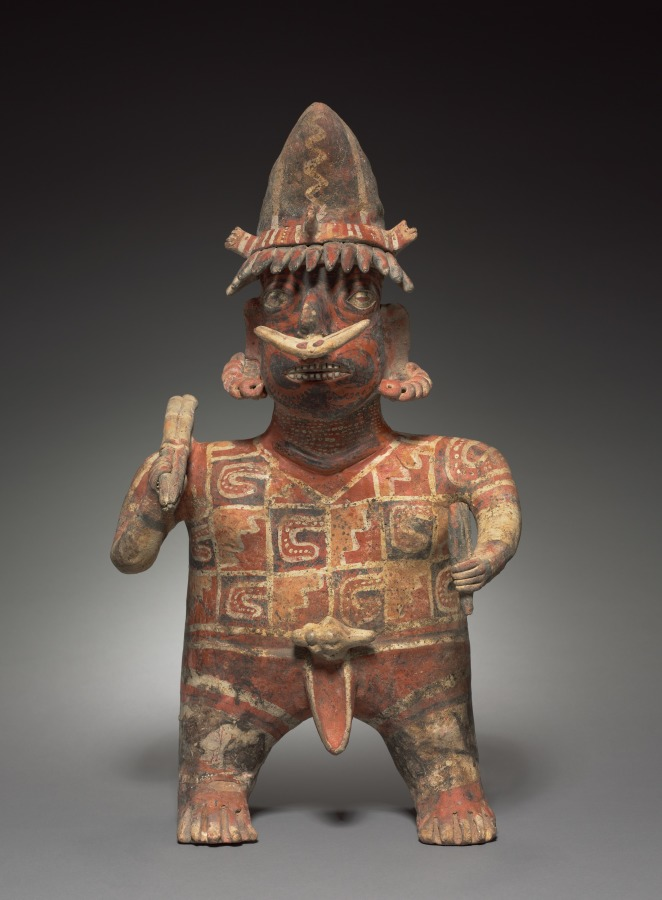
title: Pair of Standing Figures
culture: Mexico, Nayarit, Ixtlan del Rio Style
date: c. 100 BCE–300 CE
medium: earthenware with colored slips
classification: Sculpture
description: Nagarit ceramic sculputres, like those of Colima, were manufactured for burial with the dead. The popular male-female couples may be portraits of the individuals with whom they were buried. This female figure, dressed in a colorful skirt and hat, has painted or tattooed patterns on her torso and face. Jewelry adorns her face, ears, and nose. The vessel on her shoulder symbolizes her domestic duties. Like his female companion, this male figure is portrayed in all his finery. He carries spears, indicating that he is a hunter or warrior, and his confident grin conveys aggression and vitality.